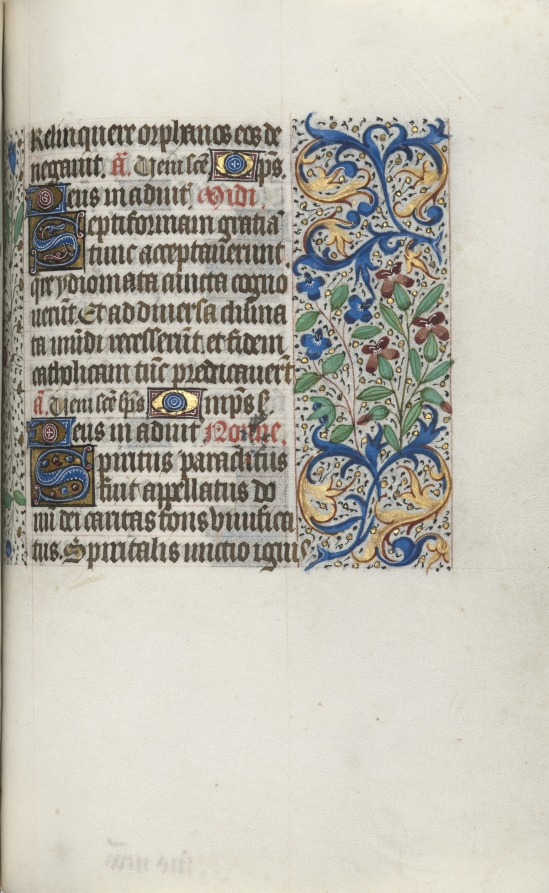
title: Book of Hours (Use of Rouen): fol. 101r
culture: France, Rouen, 15th century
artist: Master of the Geneva Latini (French, active Rouen, 1460–80)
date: c. 1470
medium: ink, tempera, and gold on vellum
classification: Bound Volume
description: In the late 1400s and early 1500s Rouen was an established and important center of book production. The city’s cathedral had a wealthy chapter that spent large sums of money to commission books and to maintain its extensive library. The stationers and booksellers would have likely been concentrated in or near the cathedral precinct. This artist, named after a manuscript now in Geneva, was Rouen’s principal illuminator during the second half of the 1400s.